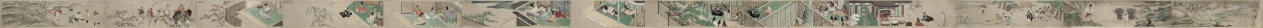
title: The Saltmaker's Story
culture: Japan, Edo period (1615–1868)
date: early 1600s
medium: One of a pair of handscrolls; ink, color, and gold on paper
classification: Painting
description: Once read and copied by girls at New Year’s celebrations and included in dowries, The Saltmaker’s Story is a rags-to-riches tale in which daughters are gifts from the gods. Despite his simple outlook, the main character progresses from humble roots as an associate at Kashima Shrine to the elite status of grandfather of the emperor through the intervention of the Kashima deity. The Saltmaker’s Story is traditionally presented in a set of three scrolls, but the text of this set has been removed by a previous owner, who remounted the illustrations as a pair. The paintings of this one take us from right to left through the first half of the tale.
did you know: This handscroll originally had texts before its paintings, but the texts were removed.